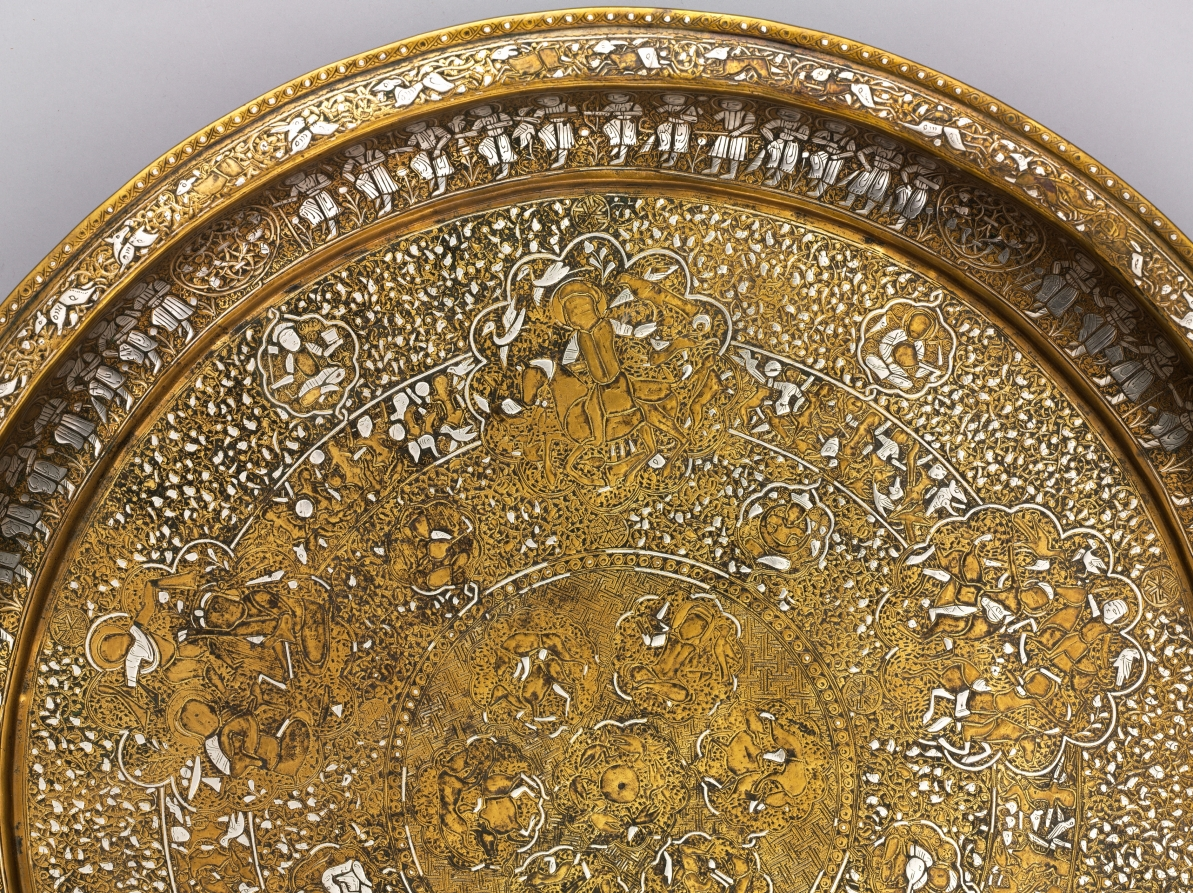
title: Tray Portraying Courtly Pleasures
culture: Syria, Ayyubid period (1171–1260)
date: 1240s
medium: sheet brass inlaid with silver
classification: Metalwork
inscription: The presence of ligatures in the narrow circular bands with interconnected human and animal figures suggests this may be a degenerate form of animated script. It is indecipherable.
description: This tray features images of courtly life interspersed with astronomical symbols. The scenes contained within large multilobed medallions display an enthroned prince with lions at his feet, a banquet, a hunt, dancers, and musicians. Contained within the concentric circles there are also references to solar and lunar motifs, including figures holding sunbursts and lunar crescents. This tray is made of a single sheet of brass and the silver inlay, which is best preserved on the tray’s inner curve, suggests its original brilliance.